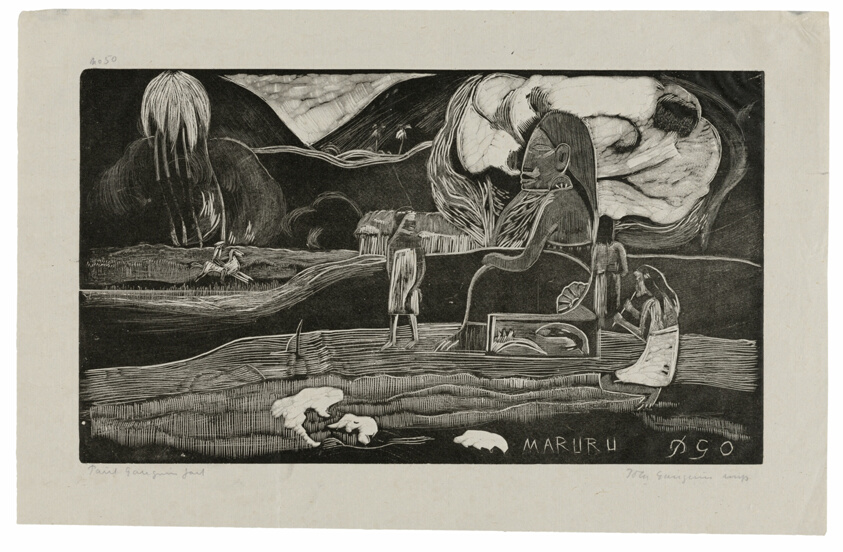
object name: Print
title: Maruru (Offerings of Gratitude), from the Noa Noa Suite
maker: Paul Gauguin (French, 1848-1903); printed by Pola Gauguin (Danish, born France, 1883-1961); published by Christian Cato, Copenhagen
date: 1893–94, printed and published 1921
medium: Wood-block print in black ink on grayish-ivory China paper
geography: France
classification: woodcut; print; prints and drawing